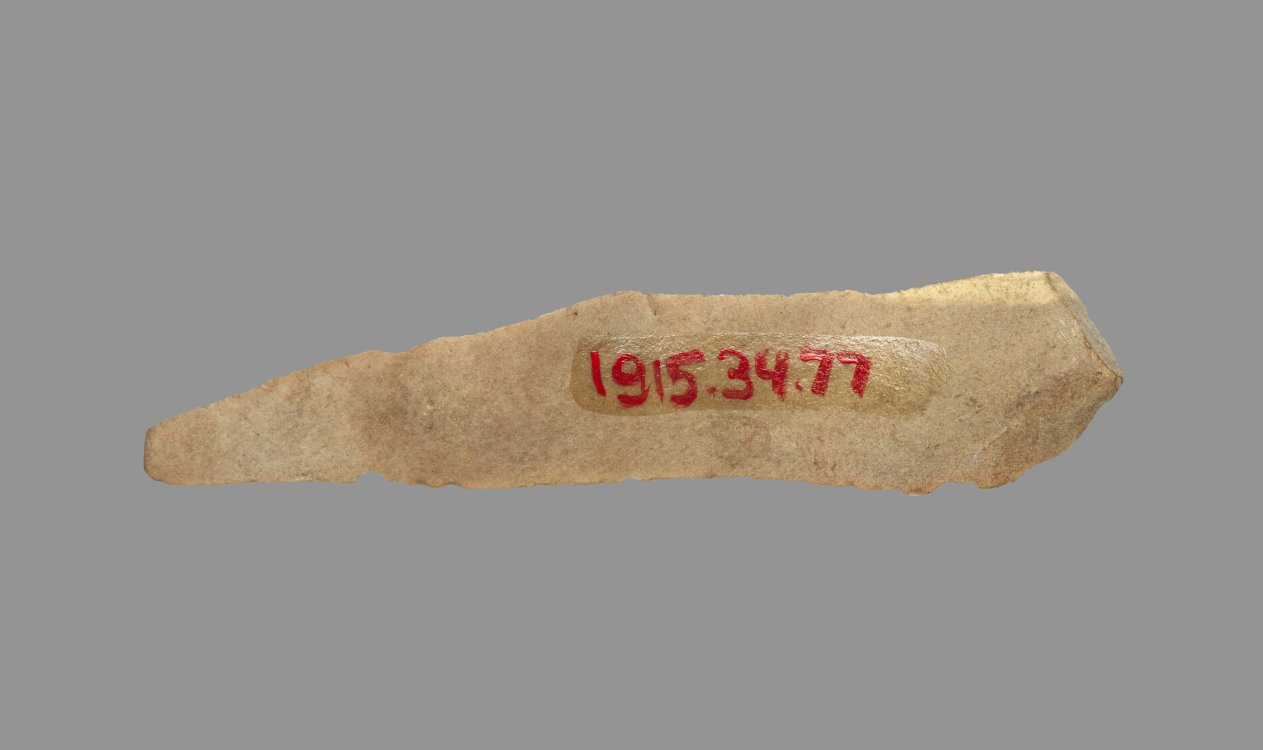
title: Sickle Blade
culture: Egypt, Middle Kingdom (2040–1648 BCE), Dynasty 12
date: 1980–1801 BCE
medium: flint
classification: Implements